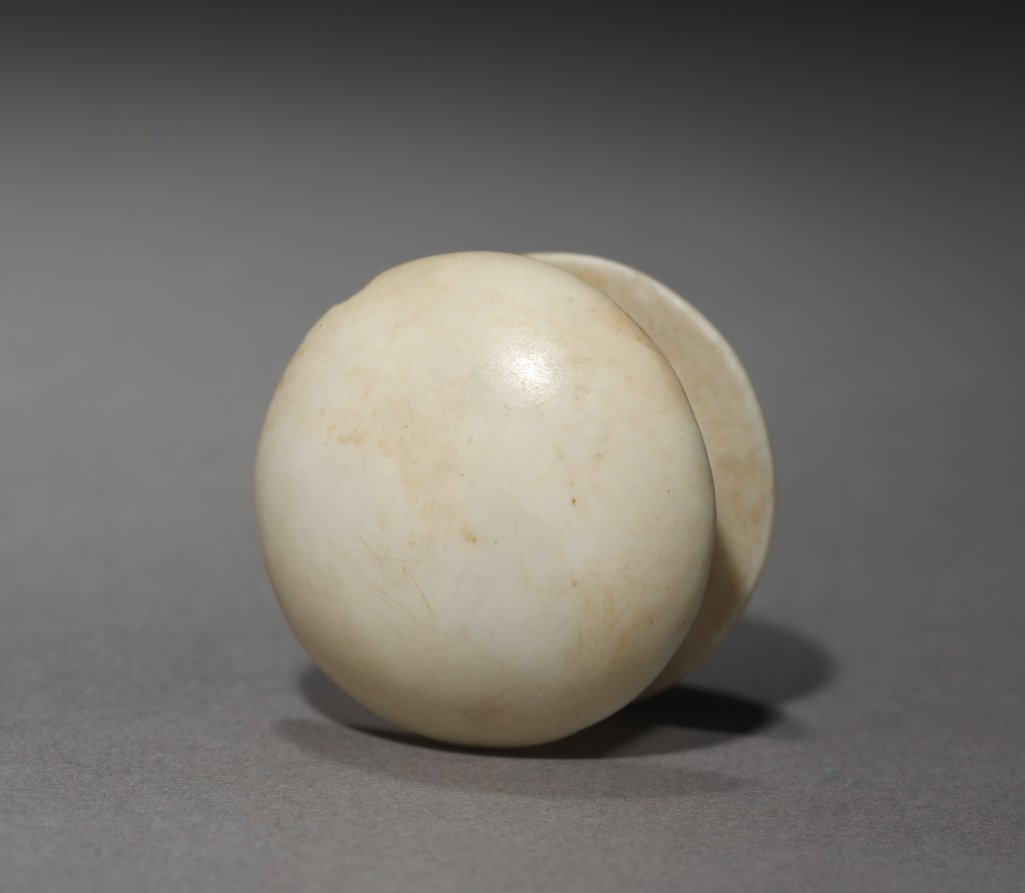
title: Pair of Earrings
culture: Egypt, New Kingdom (1540–1069 BCE), Dynasty 18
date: 1540–1296 BCE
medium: travertine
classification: Jewelry